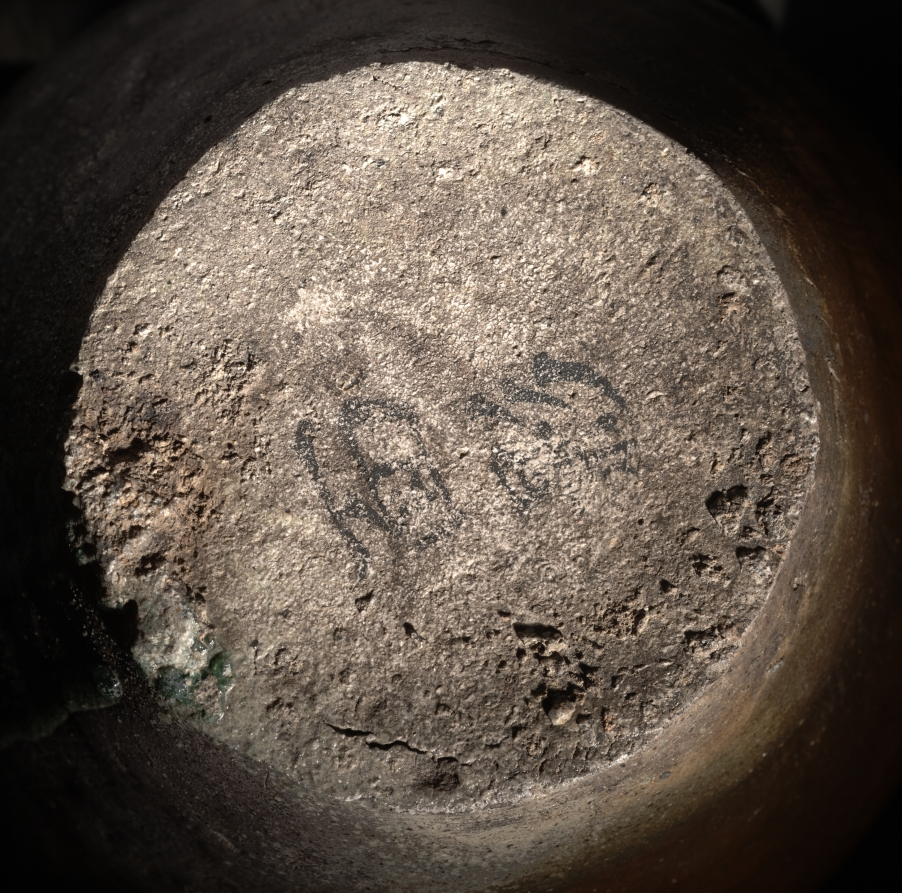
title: Storage Jar: Tamba Ware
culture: Japan, Muromachi period (1392–1573)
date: 1400s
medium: stoneware with natural ash glaze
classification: Ceramic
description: This vessel served as a storage container for rice or other grains in medieval farming communities. The piece was made by potters in Tamba, a fertile region west of Kyoto which used such vessels to send its agricultural products to towns throughout western Japan. Tamba ware is recognized by its warm green glaze, created as accumulations of natural wood ash settle on the clay body and liquefy when the kiln temperature is sufficiently high. The jar's contours reveal that it was built in four stages from many clay coils pressed together by hand. The smooth neck and mouth were wheel-turned. The vertical, incised lines visible on the reddish-brown body indicate where a comb-like tool scraped excess clay from the body wall; this technique helped conserve clay material and wood used in the firing. The scraping also exposes the grittiness of local Tamba clay, which in the 15th century did not undergo an extensive refining process.